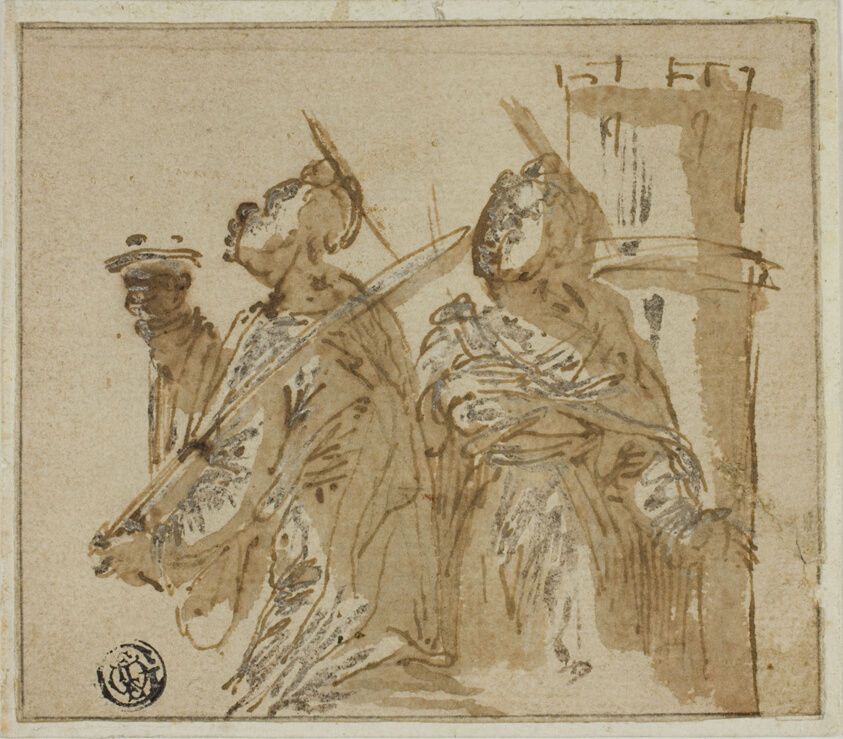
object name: Drawing and Watercolor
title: Saints Lucy and Barbara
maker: Unknown Artist; Italian, n.d.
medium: Pen and brown ink with brush and brown wash, heightened with lead white (discolored), on buff laid paper, laid down on ivory laid card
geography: Venice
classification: pen and ink drawings; drawings (visual works); prints and drawing